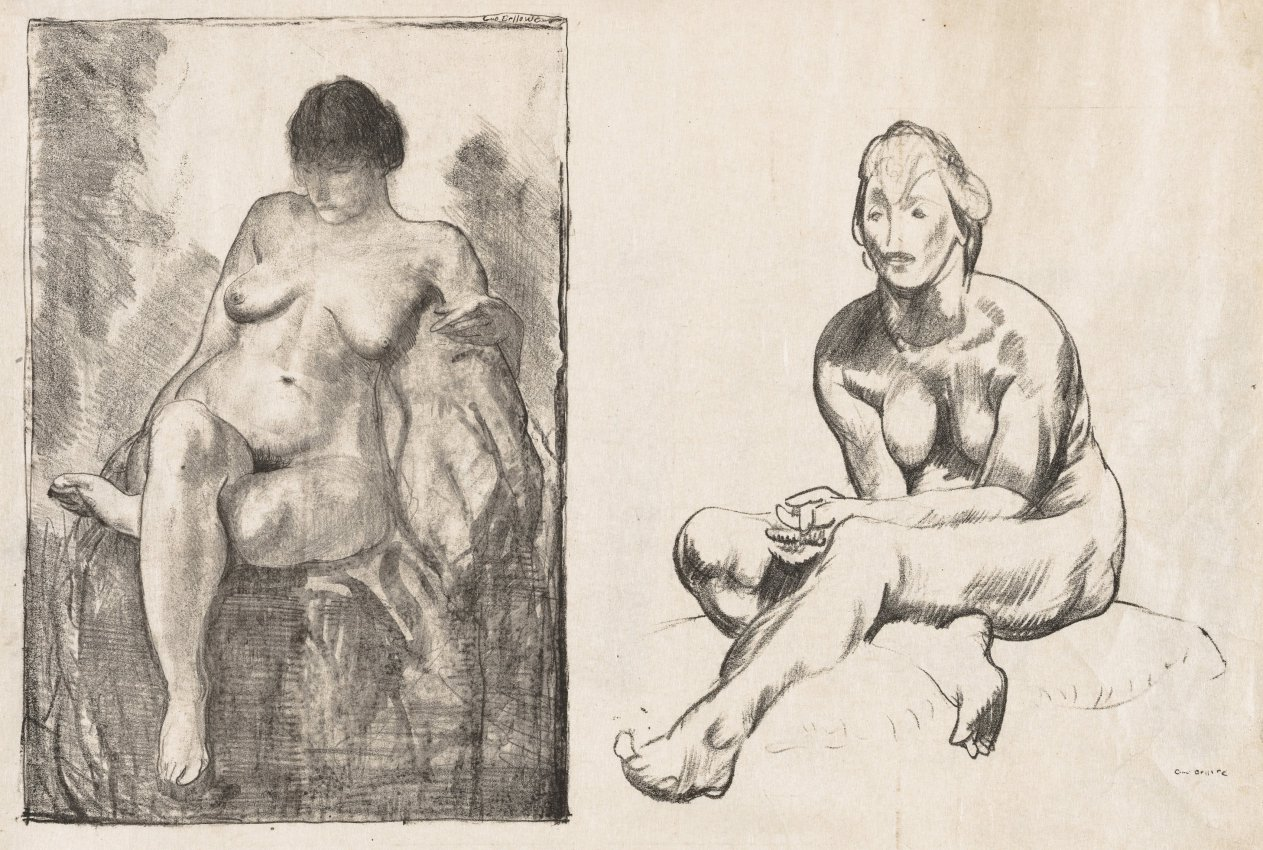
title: Nude Woman Seated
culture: America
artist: George Bellows (American, 1882–1925)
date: 1916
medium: lithograph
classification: Print